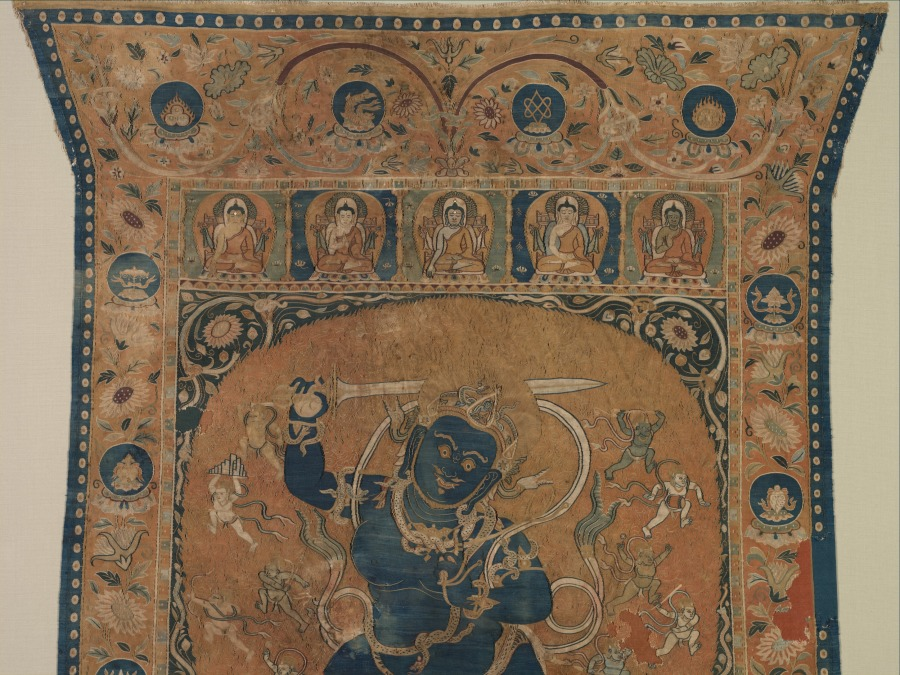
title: Achala, King of the Wrathful Ones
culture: China, Zhejiang Province, probably Hangzhou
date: early 1200s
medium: Thangka, silk tapestry with pearls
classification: Textile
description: The powerful blue body of Achala, meaning “immovable,” dominates the composition. He holds a sword to cut through ignorance and a noose for catching illusions that plague the path to enlightenment. Small personifications of furious destroyers of illusion (maya) emanate from him on either side, each with his own weapon. This image expresses what advanced practitioners would visualize in meditation rituals, as explained in Buddhist texts called tantras. Woven with a sophistication matched only by products of the Hangzhou looms, this devotional tapestry made its way to Khara-Khoto, capital of the Tangut Empire located in present-day Mongolia and Central Asia, where tantric Buddhism was prevalent.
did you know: The elephant-headed figure under his left foot is a demonic divinity, a yaksha, who creates obstacles to enlightenment.